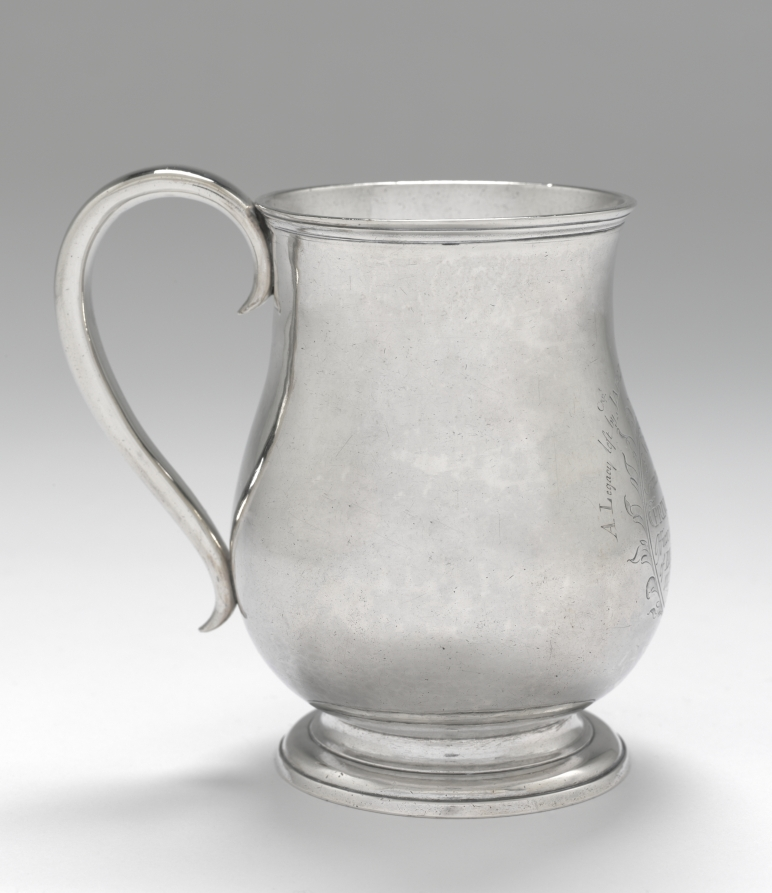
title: Cann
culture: America, Massachusetts, Boston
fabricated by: Jacob Hurd (American, 1702–1758)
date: 1747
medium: silver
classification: Silver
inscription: engraved within reserve on front, opposite handle: "A GIFT/From some of The/PRINCIPALL/ Officers in the regiment/of BOSTON to/Mr Adjutant/HUNT/1747." Above the reserve: "A Legacy left by Capt JABEZ HUNT to John Leverett Junr 1763."